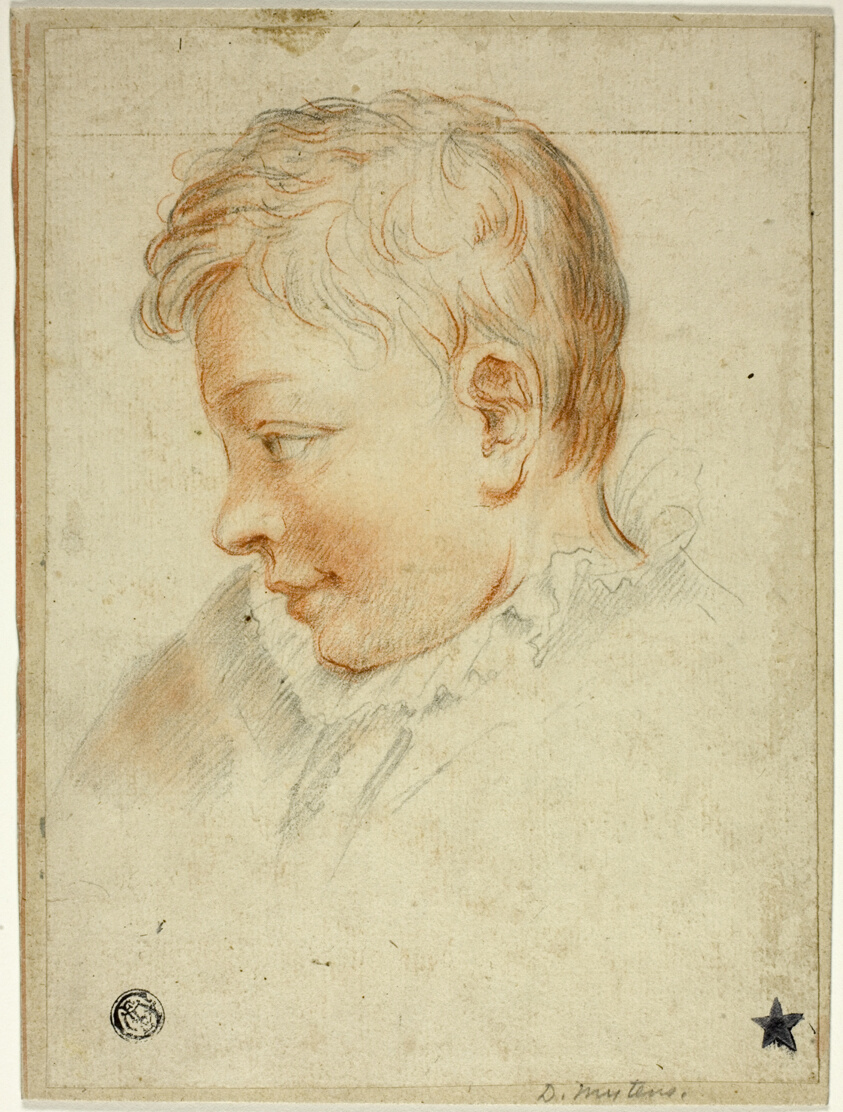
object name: Drawing and Watercolor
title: Profile Portrait of Boy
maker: Daniel Mytens, the elder (Dutch, c. 1590-before 1648)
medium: Red chalk and graphite, on ivory laid paper, laid down on card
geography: Holland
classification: chalk; drawings (visual works); prints and drawing